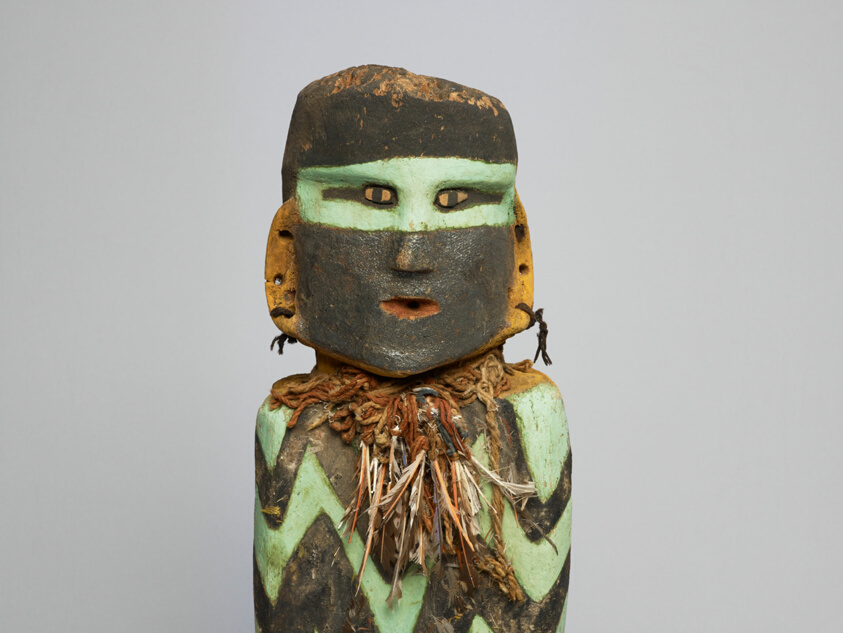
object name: Religious/Ritual Object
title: Ritual Cache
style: salado, mimbres, mogollon, americas, southwest, native american, native north american, Arts of the Americas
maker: Salado branch of the Mogollon; New Mexico, United States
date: 1300–1400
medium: Wood, stone, plant fibers, cotton, feathers, hide, and pigment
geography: New Mexico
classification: ceremonial object; ceramics; masks; ritual objects; art of the americas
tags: ceremonial objects, figures (representations), snakes, ritual objects, mountain lions, indigenous, nature, altar, offering, feathers, corn, lightning, fertility, supernatural, basketry, hunting